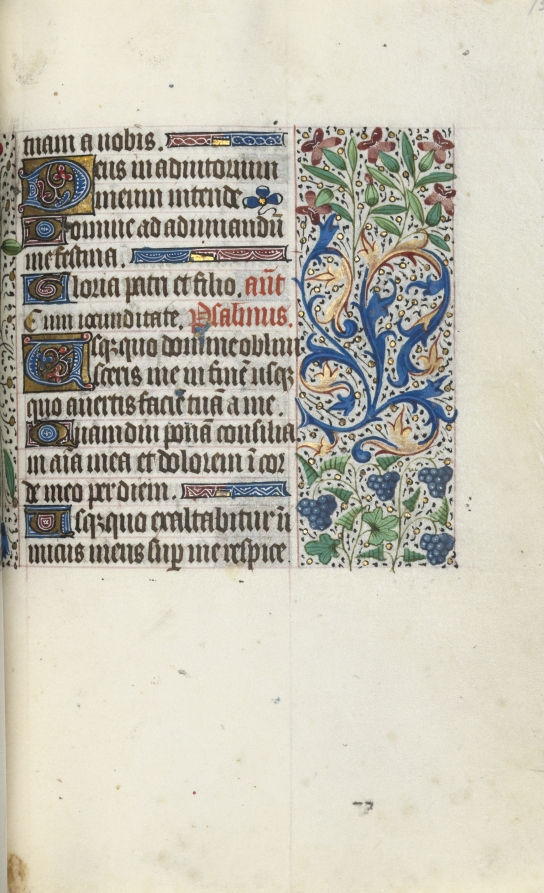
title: Book of Hours (Use of Rouen): fol. 75r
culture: France, Rouen, 15th century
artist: Master of the Geneva Latini (French, active Rouen, 1460–80)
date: c. 1470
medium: ink, tempera, and gold on vellum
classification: Bound Volume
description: In the late 1400s and early 1500s Rouen was an established and important center of book production. The city’s cathedral had a wealthy chapter that spent large sums of money to commission books and to maintain its extensive library. The stationers and booksellers would have likely been concentrated in or near the cathedral precinct. This artist, named after a manuscript now in Geneva, was Rouen’s principal illuminator during the second half of the 1400s.